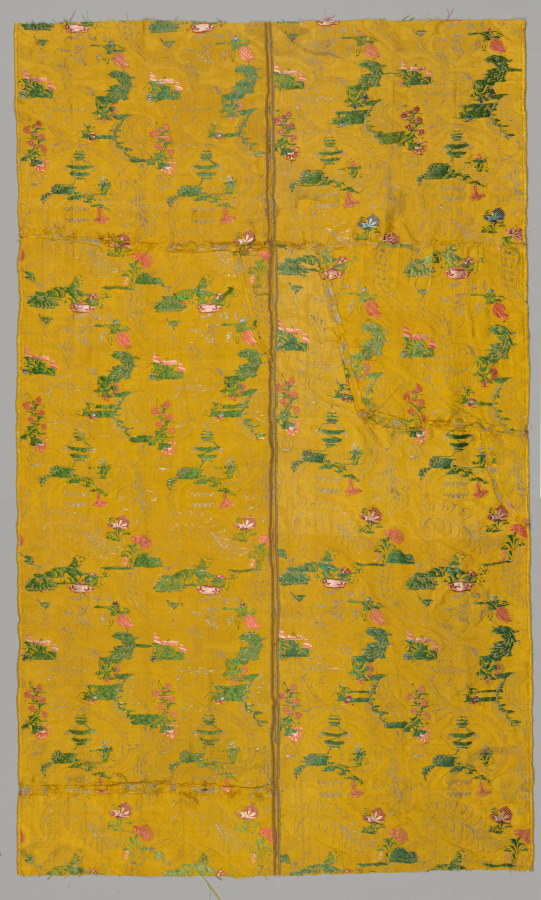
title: Table Cover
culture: Italy, Venice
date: late 1600s - early 1700s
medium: satin weave, brocaded; silk and metal thread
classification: Textile